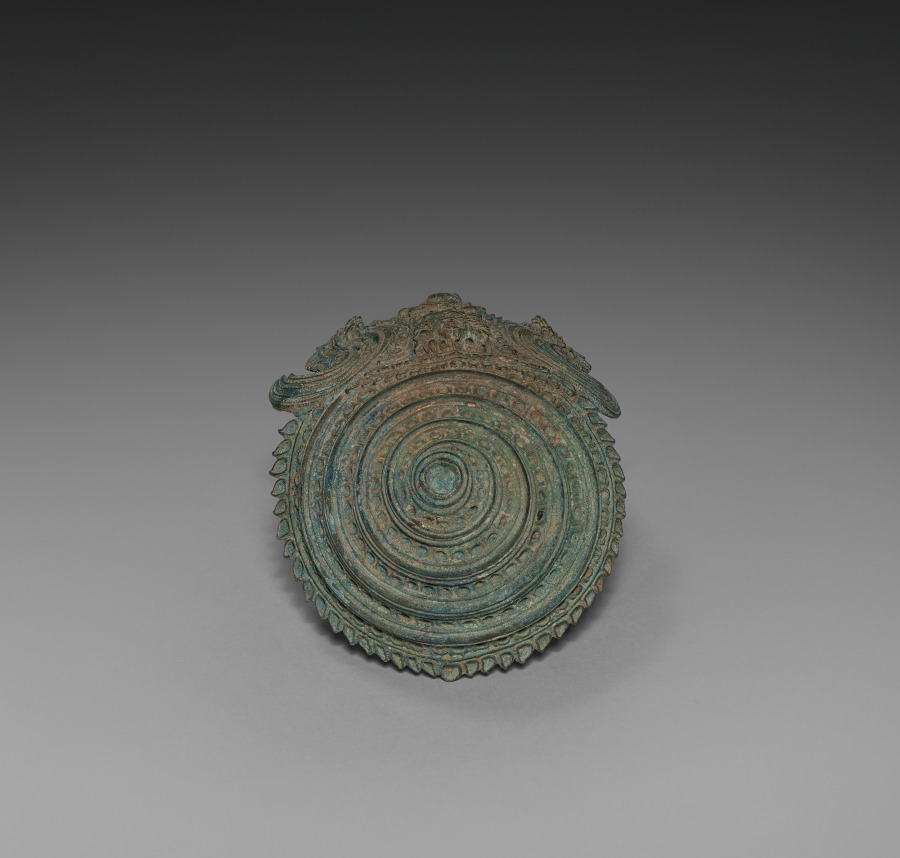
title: Ritual conch shell base with dancing Hevajra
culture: Cambodia, Khmer, Angkor Period, 12th-13th Century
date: 1100s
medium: shell and bronze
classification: Sculpture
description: A royal temple like Banteay Chhmar was built for performing rituals and to honor images of gods, Buddhas, and other sacred or enlightened beings for the sake of the kingdom’s protection and ongoing prosperity. Conch shells were blown at the start of rituals to make the sound corresponding to the syllable om. The dancing figure of Hevajra, a Buddhist being of enlightenment with eight heads, sixteen arms, and four legs, has been worked into the bronze embellishment of the shell. Hevajra was elevated to a prominent position in Khmer Buddhism of the Angkorian period as the standard figure denoting the practice of rituals prescribed in a text called the Hevajra-tantra. The tripod stand with three serpents is probably not original to the shell.